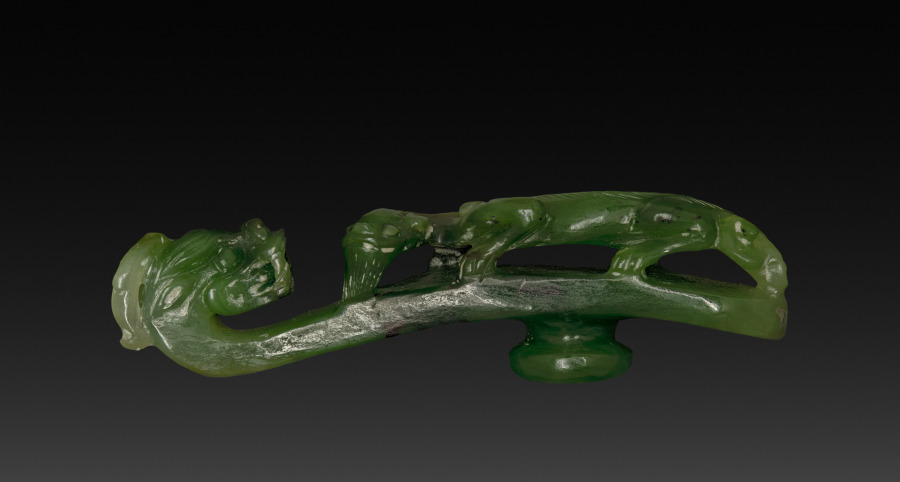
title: Buckle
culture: China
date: 1900s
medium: jade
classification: Jewelry